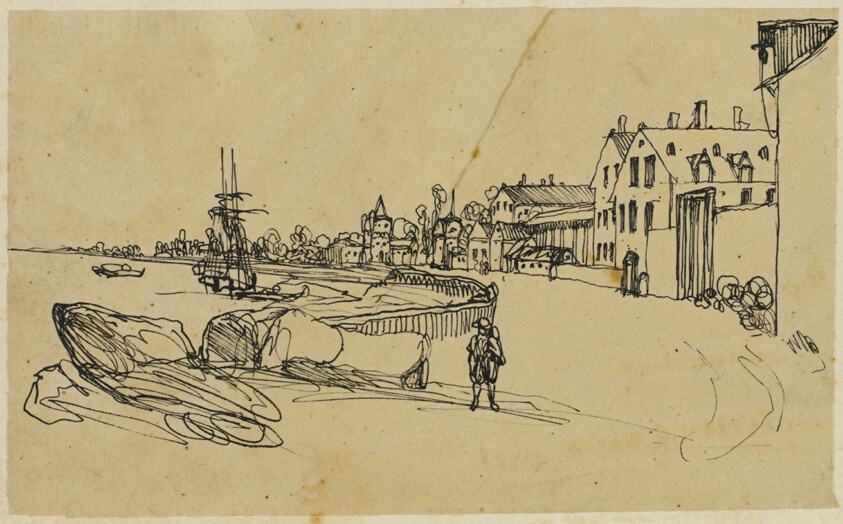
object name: Drawing and Watercolor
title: The Shore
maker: Rodolphe Bresdin (French, 1825-1885)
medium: Pen and black ink, on tan tracing paper, laid down on buff wove paper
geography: France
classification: pen and ink drawings; drawings (visual works); prints and drawing